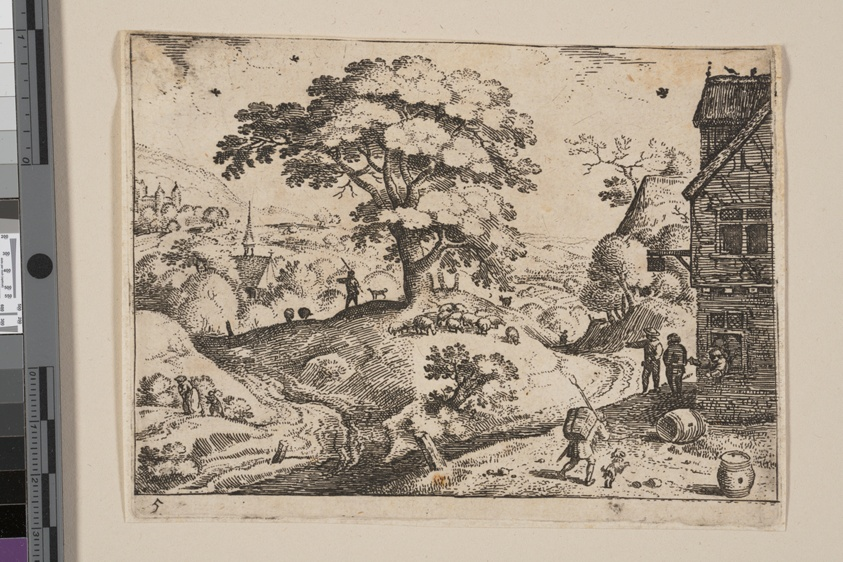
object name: Print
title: Inn to Right of Road before Village, from Landscapes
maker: Jacob Savery; Flemish, 1566–1603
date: c. 1595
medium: Etching on ivory laid paper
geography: Flanders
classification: etching; paper; print; prints and drawing